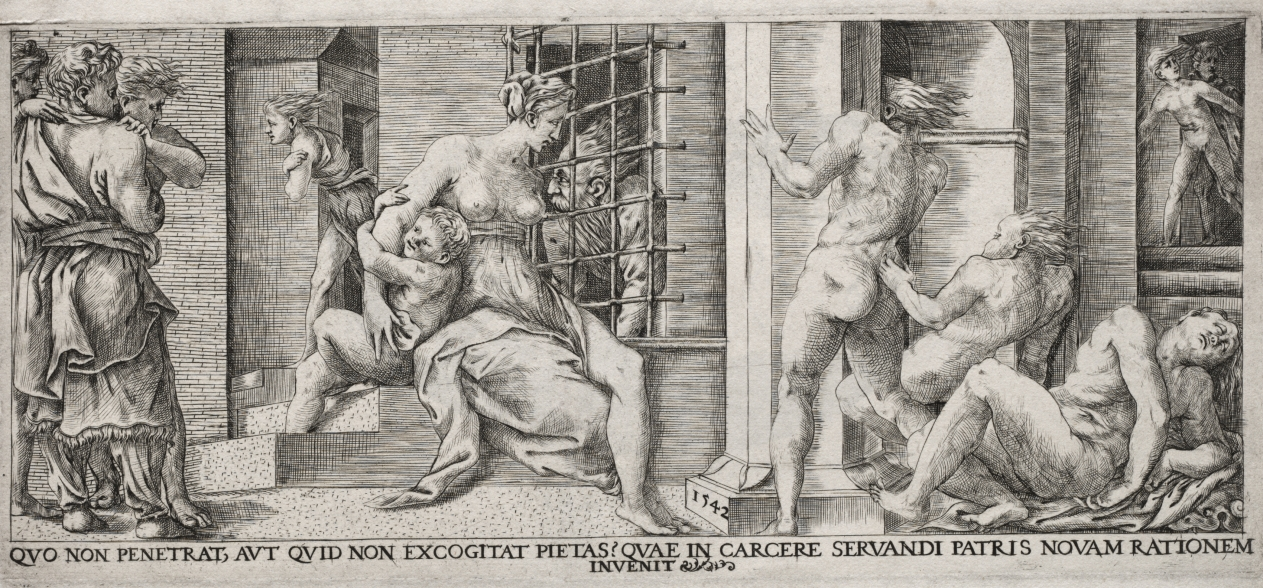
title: Roman Charity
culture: France, 16th century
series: After a Relief in Fountainbleau Palace, Gallery of Francis I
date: 1500s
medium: etching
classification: Print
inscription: Lower platemark engraved: "QVO NON PENETRAT, AVT QVID NON EXCOGITAT PIETAS? QVAE IN CARCERE SERVANDI PATRES NOV AM RATIONEM" Inventit